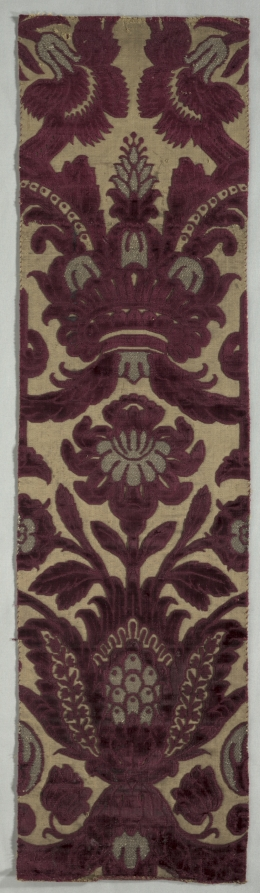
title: Velvet Textile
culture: Italy, Genoa ?, second half of 17th century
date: 1600s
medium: velvet (cut and uncut); silk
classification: Velvet